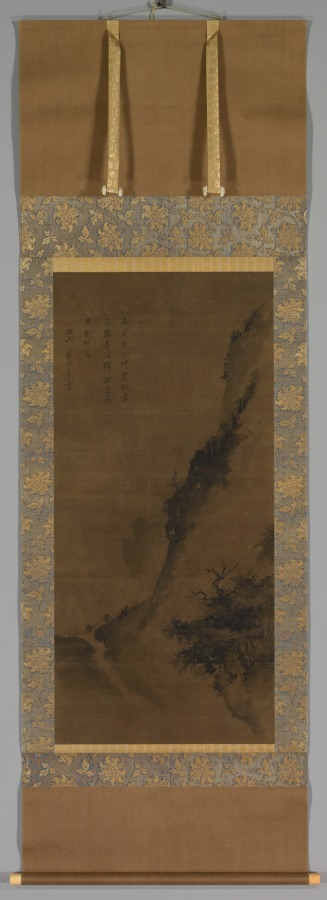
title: Landscape with Woodcutters Returning Home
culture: China, Southern Song dynasty (1127-1279)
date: 1200s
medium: hanging scroll, ink on silk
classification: Painting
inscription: inscribed by Xuzhou Pudu 虛舟普度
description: In late Song dynasty Chinese Chan Buddhist temples, paintings of landscapes, animals, or plants frequently took the place of deities. This hanging scroll features the humble life of woodcutters in nature an is in keeping with the Chan emphasis on simplicity and on the spiritual benefits of manual labor. executed in broad, quickly applied washes and punctuated by dark dots and texture strokes, the work is inscribed by Xuzhou Pudu, a priest at Wanshou temple near the Southern Song capital at Lin'an (modern Hangzhou).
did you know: A landscape with identical measurements in a Japanese private collection is also inscribed by Xuzhou. They may have been a pair of flanking scrolls in a triptych.